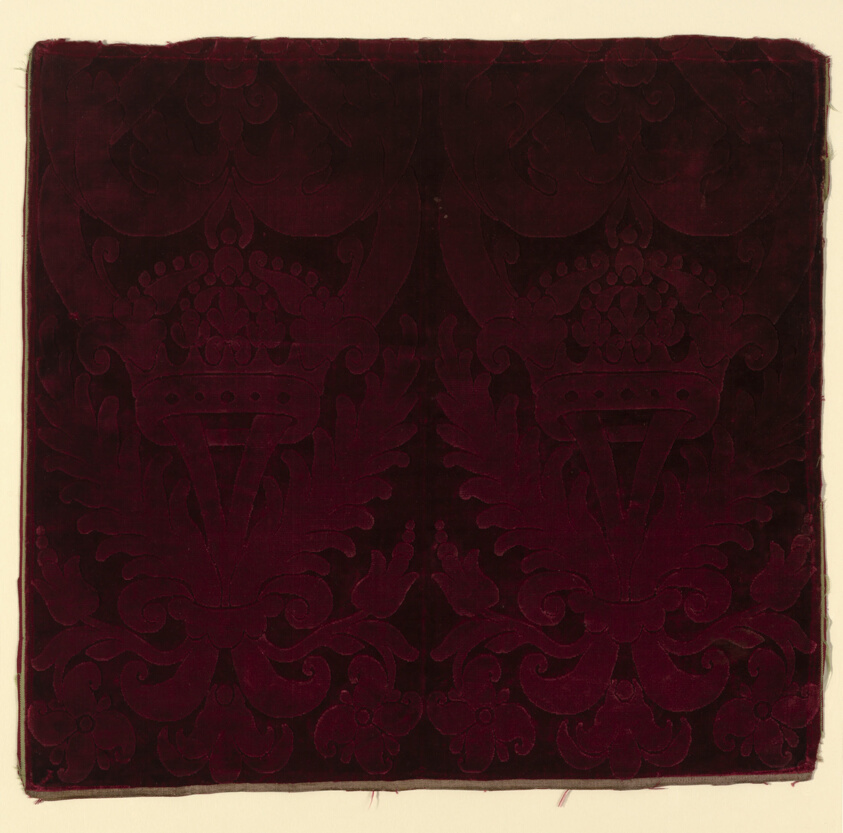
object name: Textile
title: Panel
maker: Italy, Venice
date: 1550/1600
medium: Silk, warp-float face broken 3:1 twill weave with supplementary pile warps forming cut pile-on-pile solid velvet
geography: Venice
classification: textile; weaving - velvet